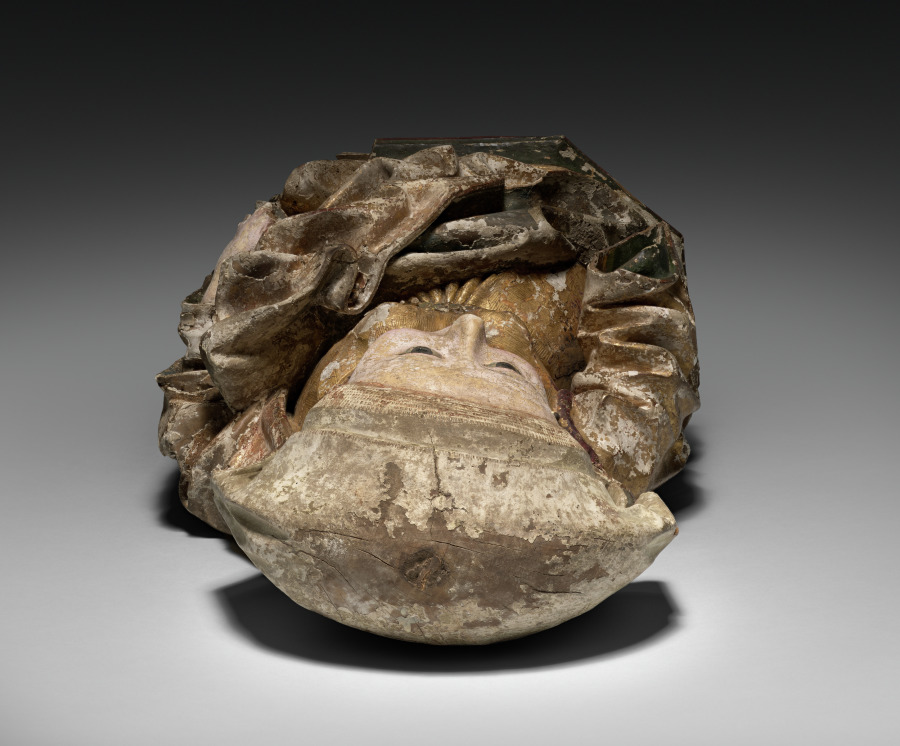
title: Female Bust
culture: Austria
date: c. 1470–1500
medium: Painted and gilded lindenwood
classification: Sculpture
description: This female bust is part of a series of three in the museum's collection. The identity of the figures has been speculated by scholars but without resolution. Because this and the other female busts in the series do not retain their attributes, it is difficult to know their original purpose. It is possible that they may have once formed a group of female saints from the predella of a large altarpiece. Since the sculpture is not carved in the round, this hypothesis has merit. Another recent proposal is that this and the other sculptures may be from a series of female busts representing the wise and foolish virgins referenced in Matthew 25:1-13, a parable by Jesus admonishing listeners to be spiritually prepared.